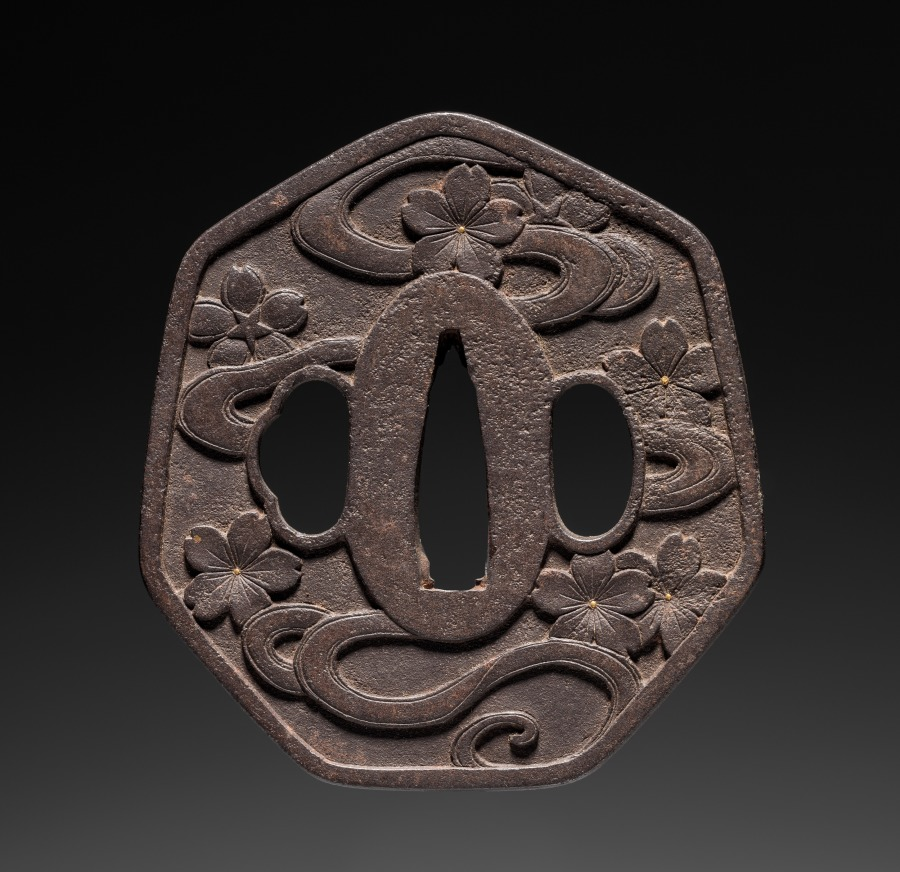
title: Sword Guard (Tsuba) with Cherry Blossoms on River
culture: Japan, possibly Edo period (1615-1868)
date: c. 1615–1868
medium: iron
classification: Arms and Armor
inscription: signed: 武州住正春